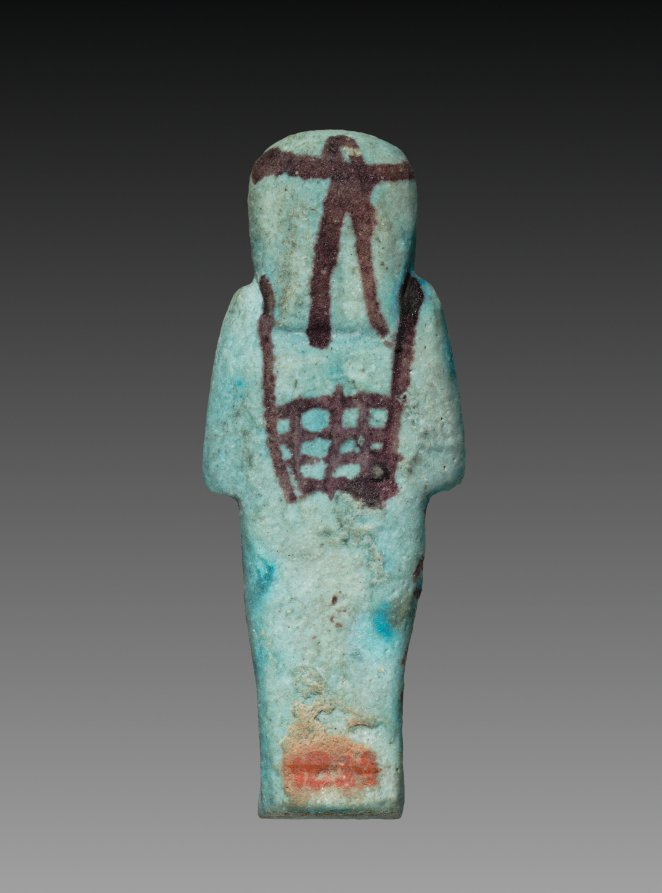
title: Shawabty of Tanetosorkon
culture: Egypt, Third Intermediate (1069–715 BCE), Dynasty 21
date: 1000–956 BCE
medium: turquoise faience with purple decoration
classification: Funerary Equipment